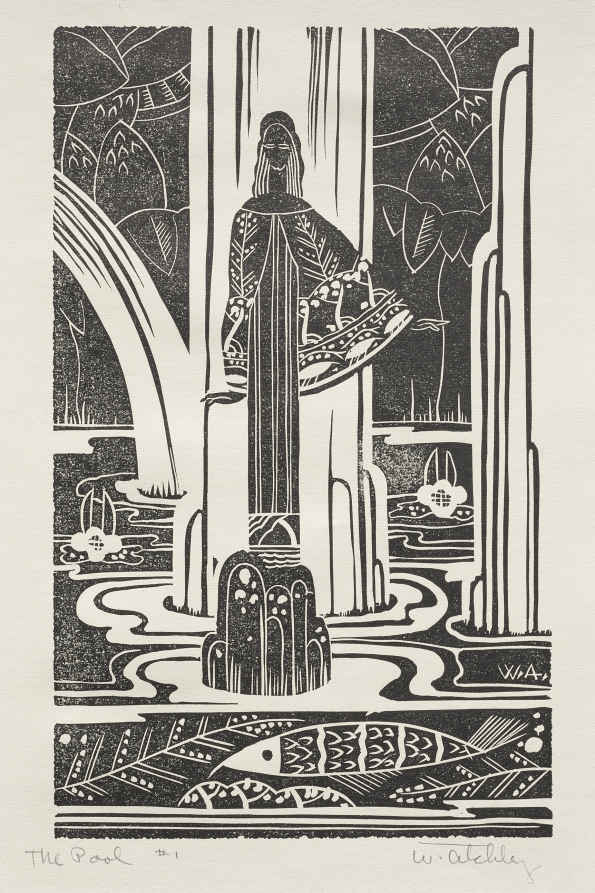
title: The Pool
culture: America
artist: Whitney Atchley (American, 1908–1955)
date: 1930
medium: linoleum cut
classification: Print